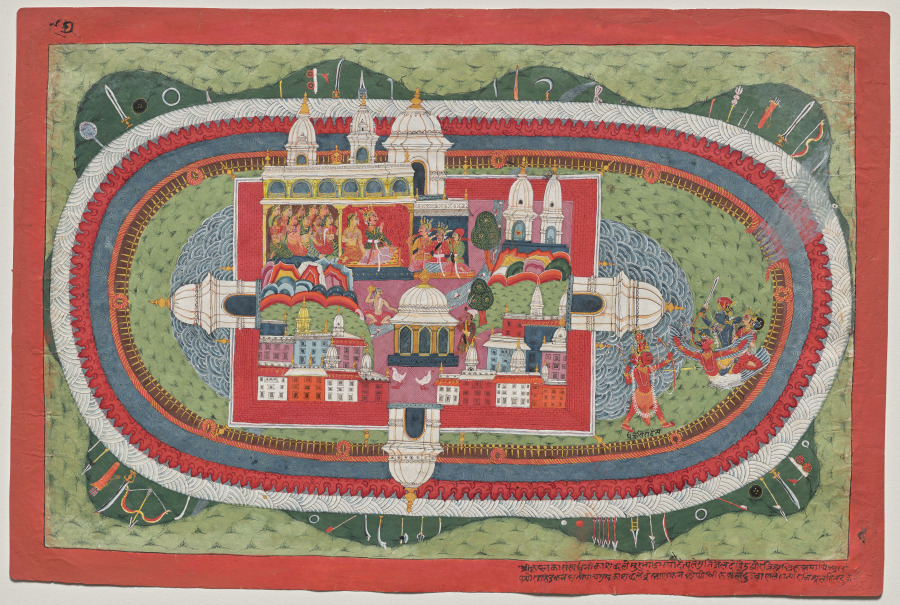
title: Krishna and Satyabhama Storm the Citadel of Naraka, folio 97 from a Bhagavata Purana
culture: Nepal, Kathmandu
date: c. 1775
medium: Gum tempera and ink on paper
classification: Painting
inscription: [[Lower right corner, bottom margin, descriptive caption in a Nepali vernacular, written in Devanagari script]]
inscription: [[Folio number in the upper left corner]] 97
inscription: [[Folio number in lower right margin]] 9[7]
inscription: [[Label inscription below the red demon in the lower right, in a Nepali vernacular, written in Devanagari script]] paṁcasirādaisa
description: From a series depicting the life of Krishna, an incarnation of the Hindu god Vishnu, this scene takes place at the demon king Naraka’s citadel. Seen from above, the mountaintop fortress is surrounded by concentric fortifications that recall the format of a mandala. In the upper left chambers, Naraka sits with nymphs he abducted from heaven. At the right, coming to rescue them, the blue Krishna with his wife blasts through the fortifications on his man-eagle mount Garuda. He prepares to shoot a crescent-shaped arrowhead that has the magical power of a mantra capable of destroying the multiheaded red demon guard.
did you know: Krishna’s arrowheads are crescent-shaped, meaning that they have the destructive power of special mantras.